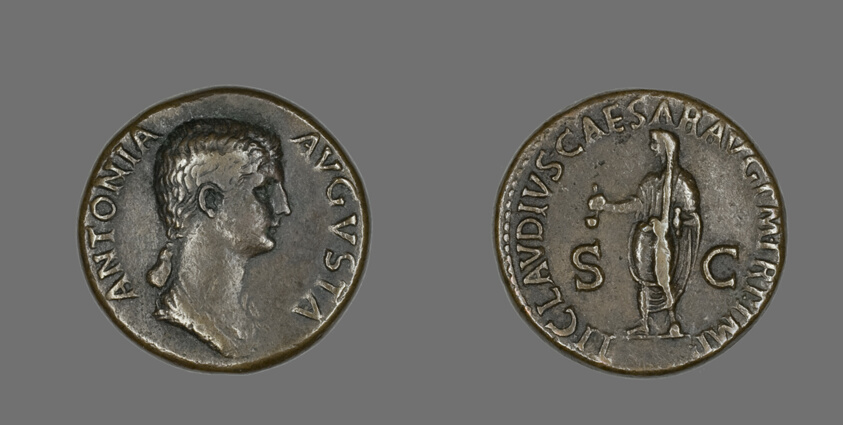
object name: Coin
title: Dupondius (Coin) Portraying Antonia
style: imperial (roman), ancient, roman (ancient, style or period)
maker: Roman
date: 50-54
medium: Bronze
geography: Roman Empire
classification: coin; ancient art